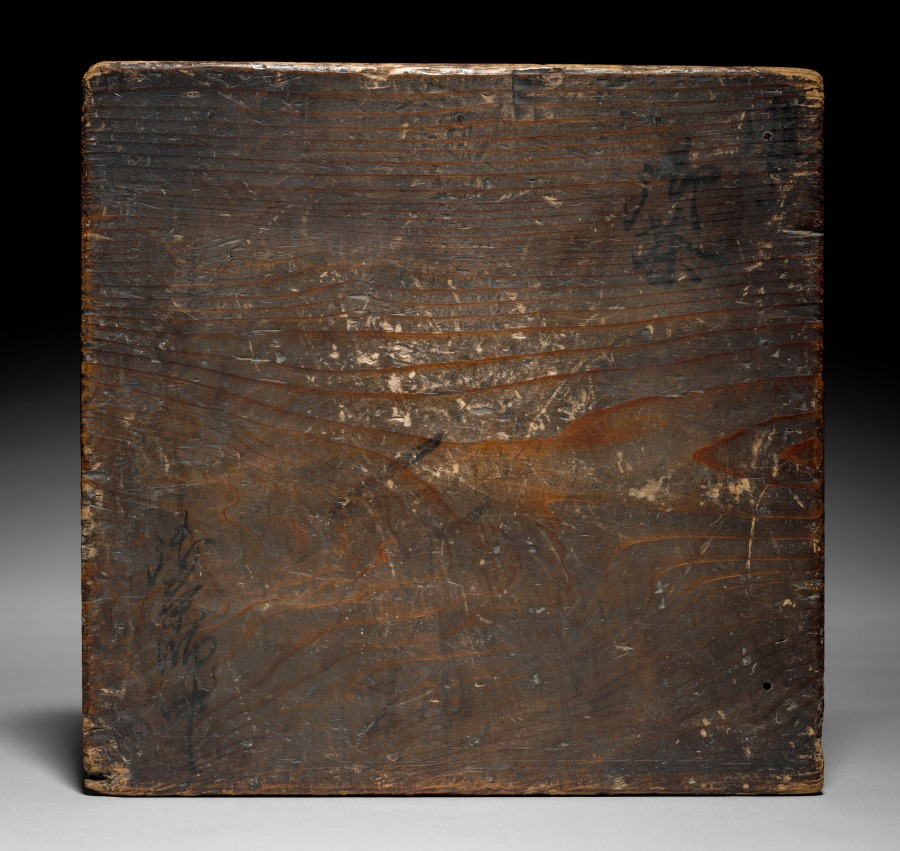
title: Water Container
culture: Japan, Momoyama period (1573–1615)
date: early 1600s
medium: glazed stoneware (Bizen ware, Imbe type)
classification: Ceramic